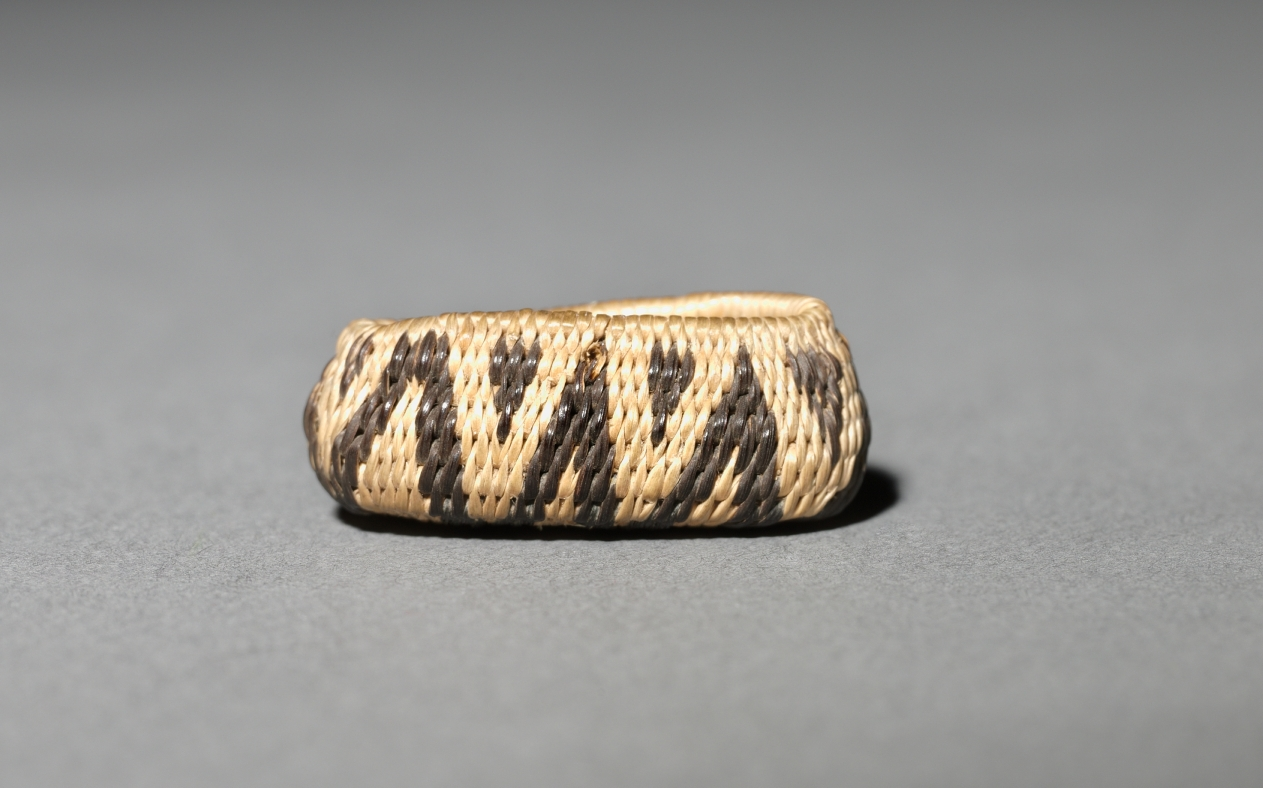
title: Miniature Oval Basket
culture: California, Pomo, late 19th-early 20th century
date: late 1800s-early 1900s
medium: plant materials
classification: Basketry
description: Miniature baskets were made to demonstrate the basket-maker’s virtuoso skill, and these tiny marvels seem to be no exception—the smallest are just a few millimeters wide but still patterned. For such fine work, dexterity was required as much for preparation of materials as for weaving.